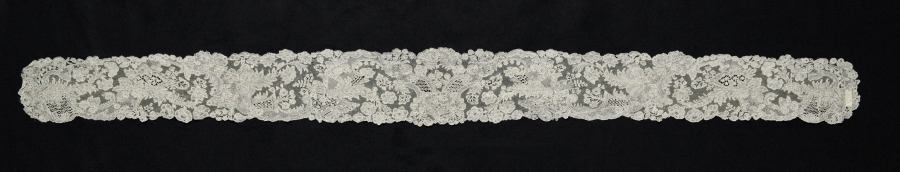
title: Lace Lappet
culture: Belgium, Brussels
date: 1700s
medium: Linen: bobbin lace (Point d'Angleterre)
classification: Lace